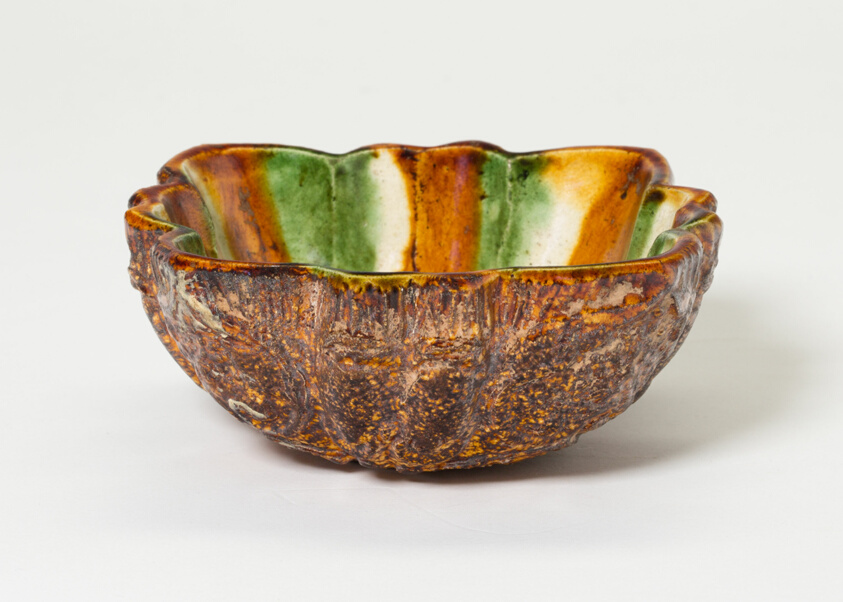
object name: Vessel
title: Lobed Bowl with Foliate Medallions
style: Chinese (culture or style)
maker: China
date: Tang dynasty (618–906), first half of 8th century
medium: Earthenware with three color (sancai) lead glazes and underglaze molded decoration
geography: China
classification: bowl; earthenware; dish (vessel); asian art; ceramics; vessel